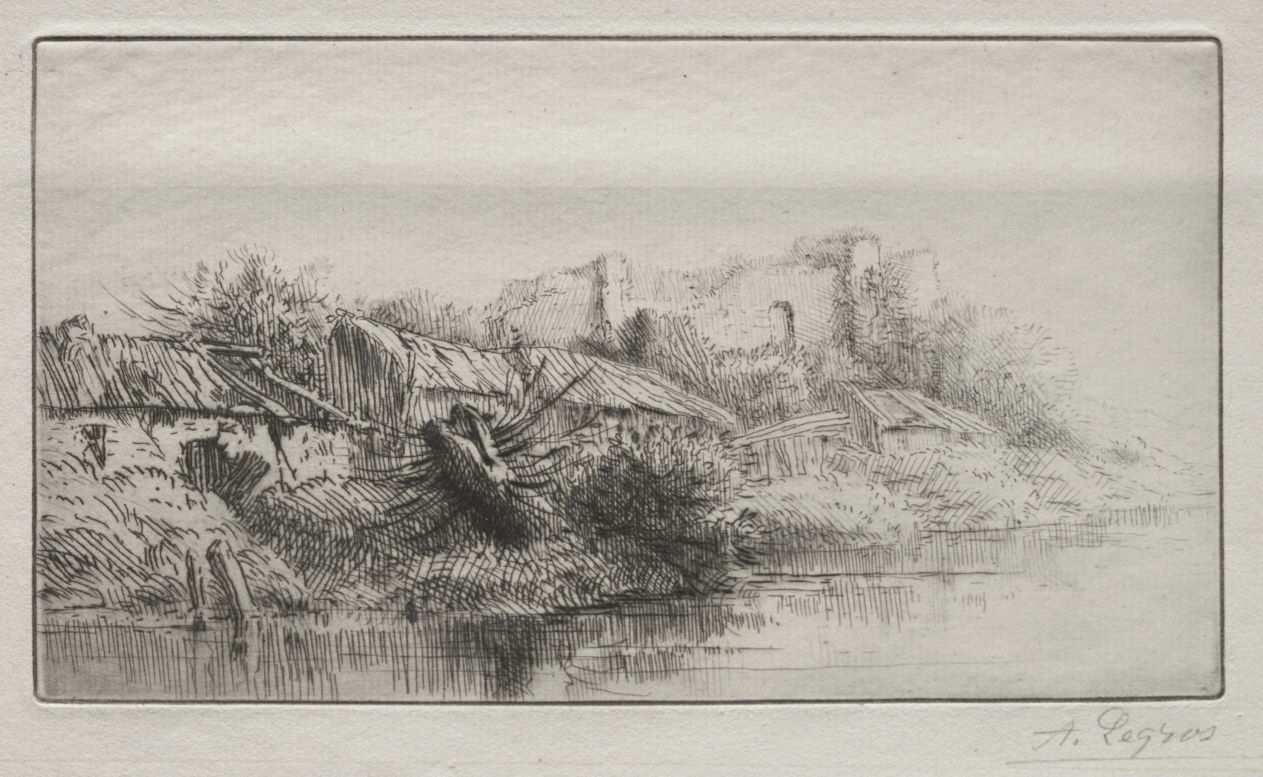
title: Deserted Village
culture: France, 19th-20th century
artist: Alphonse Legros (French, 1837–1911)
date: c. 1857–1911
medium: etching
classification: Print